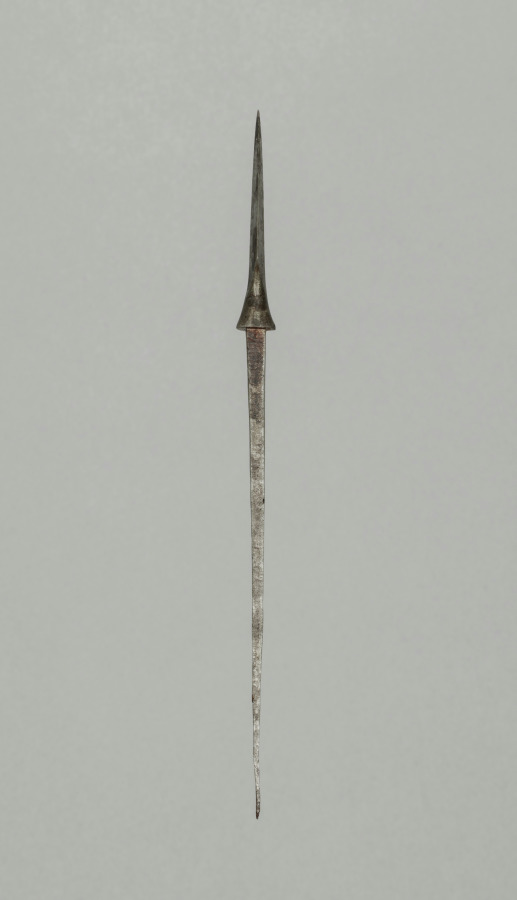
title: Arrow Point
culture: Japan, Edo period (1615–1868)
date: 1700s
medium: steel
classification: Arms and Armor